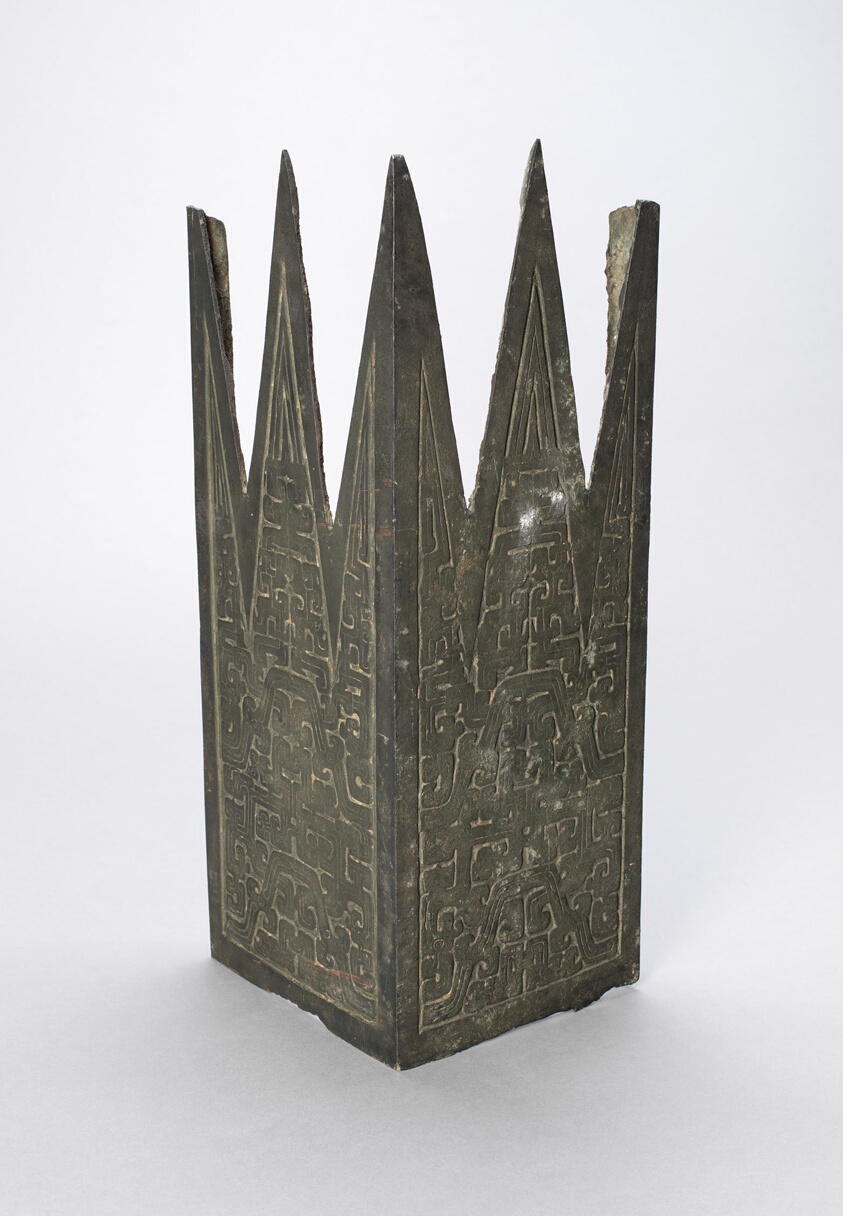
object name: Architectural fragment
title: Architectural Fitting (Gong)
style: Chinese (culture or style)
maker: China, Qishan county, Shaanxi province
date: Eastern Zhou dynasty, Spring and Autumn period (770–481 B.C.), 7th century B.C.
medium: Bronze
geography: China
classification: architectural fragment